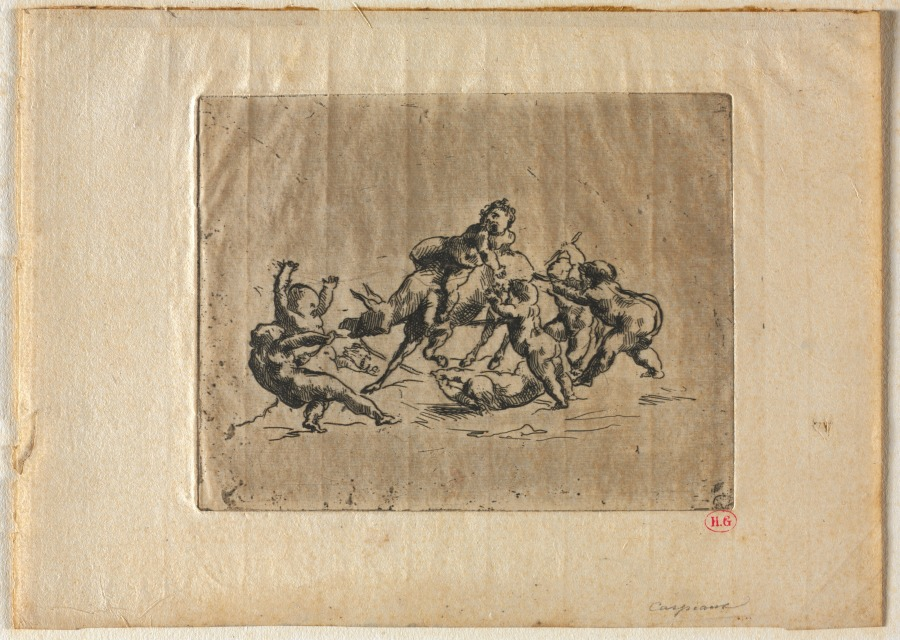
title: Bacchanal with Children and Donkey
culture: France, 19th century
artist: Jean-Baptiste Carpeaux (French, 1827–1875)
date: c. 1860–70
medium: etching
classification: Print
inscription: below the lower right platemark edge: stamp for Hector Giacomelli (Lugt 1311)